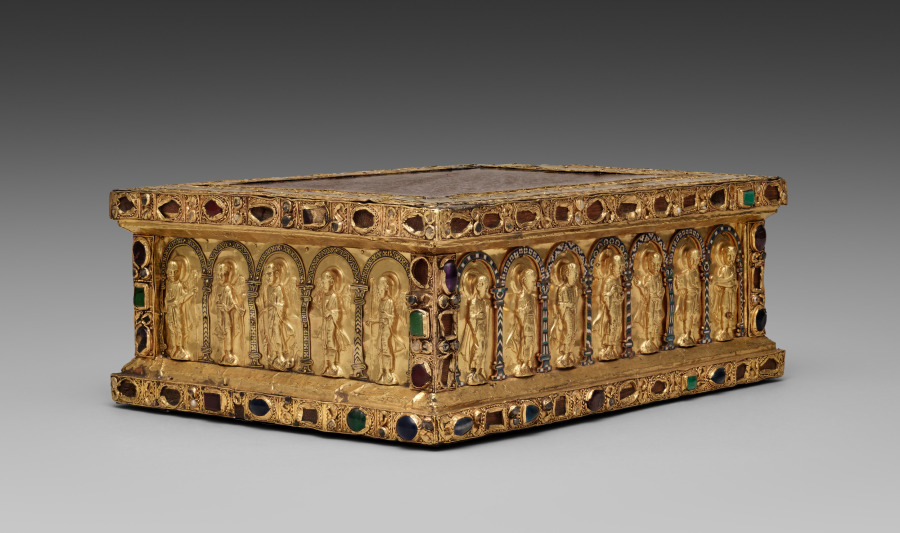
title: Portable Altar of Countess Gertrude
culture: Germany, Lower Saxony?, Romanesque period, 11th century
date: c. 1045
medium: gold, cloisonné enamel, porphyry, gems, pearls, niello, wood core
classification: Metalwork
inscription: GERDRVDIS XPO FELIX VT | VIVAT IN IPSO OBTVLIT HVNC LAPIDEM GEMMIS | AVROQ NITENTEM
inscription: SIGISMVNDVS, CONSTANTIVS, SANCTA CRVX, SCA ELENA, SCA ADALHEIT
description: Commissioned by Countess Gertrude of Brunswick, this portable altar is one of the Guelph Treasure’s earliest and most sumptuous objects. The choice of white-speckled porphyry as the altar stone signals Gertrude’s worldly aspirations; an imperial color since classical antiquity, porphyry was only used by the imperial family. Historical figures of royal and imperial rank are depicted with Christ, the Virgin, apostles, and archangels along the altar’s sides, stressing the countess’s political ambitions and claim of imperial lineage for her own dynasty. The Latin inscription surrounding the altar stone reads, "Gertrude offers to Christ, to live joyfully in him, this stone that glistens with gems and gold."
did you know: On the bottom of this altar is a trap door that opened to reveal small relics of saints wrapped in silk.